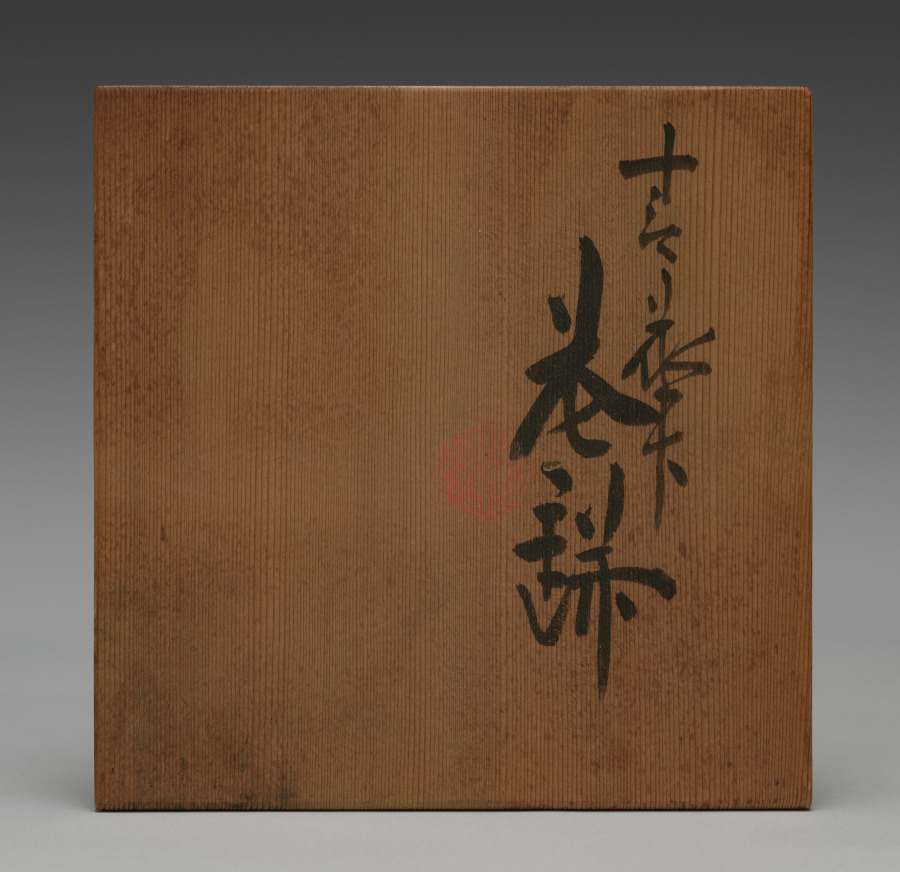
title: Flower Vase with Phoenix in Paulownia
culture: Japan, Meiji period (1868–1912)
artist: Seifū Yohei III (Japanese, 1851–1914)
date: 1897–1914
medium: Porcelain with molded and carved design and underglaze color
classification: Ceramic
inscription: 清風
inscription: 清風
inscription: 清風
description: The phoenix’s commanding presence on this vase was created by adding clay to the surface of the white clay body and then intricately molding and carving it. Then cobalt blue was used to paint the paulownia tree upon which the phoenix perches. Yohei III used a masking technique, covering the phoenix with paper before adding pink color to the area surrounding it. Firing with an allover transparent glaze created a glossy surface, with the phoenix standing out boldly from the background. The mythical bird’s long tail sweeps majestically around the vessel so that one must move around it to see the eyespots in its plumes. A symbol of imperial power in both China and Japan, the phoenix is said to alight only in the paulownia tree. Upon close inspection of its face, one can see that the phoenix’s eye is in yellow under the glaze. The scene is set off at the bottom with a double band of underglaze blue above an incised ring of cloud. Once Yohei III had created his creamy translucent taihakuji glaze, he began applying it over the entire surface of an ivory clay body with motifs in low relief to achieve a creamy white-on-white design. He then began using the combination of gradated pink around raised motifs on a typical white porcelain clay body like the one for this vase. He masked his low-relief designs with paper before sprinkling diluted iron oxide glaze onto the surrounding areas through a net with a brush. These unpigmented elements stand out as starkly white against the gentle pink blush color that surrounds them. Still later, he added pink to the translucent creamy glaze he used in kanpakuji works and used it over motifs in relief on an ivory clay body for an overall pink-tinged cream effect (see CMA 2022.198).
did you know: In 1893, Seifū Yohei III became the first ceramist to be appointed as an Imperial Household Artist under a system introduced by the Japanese government in 1890.